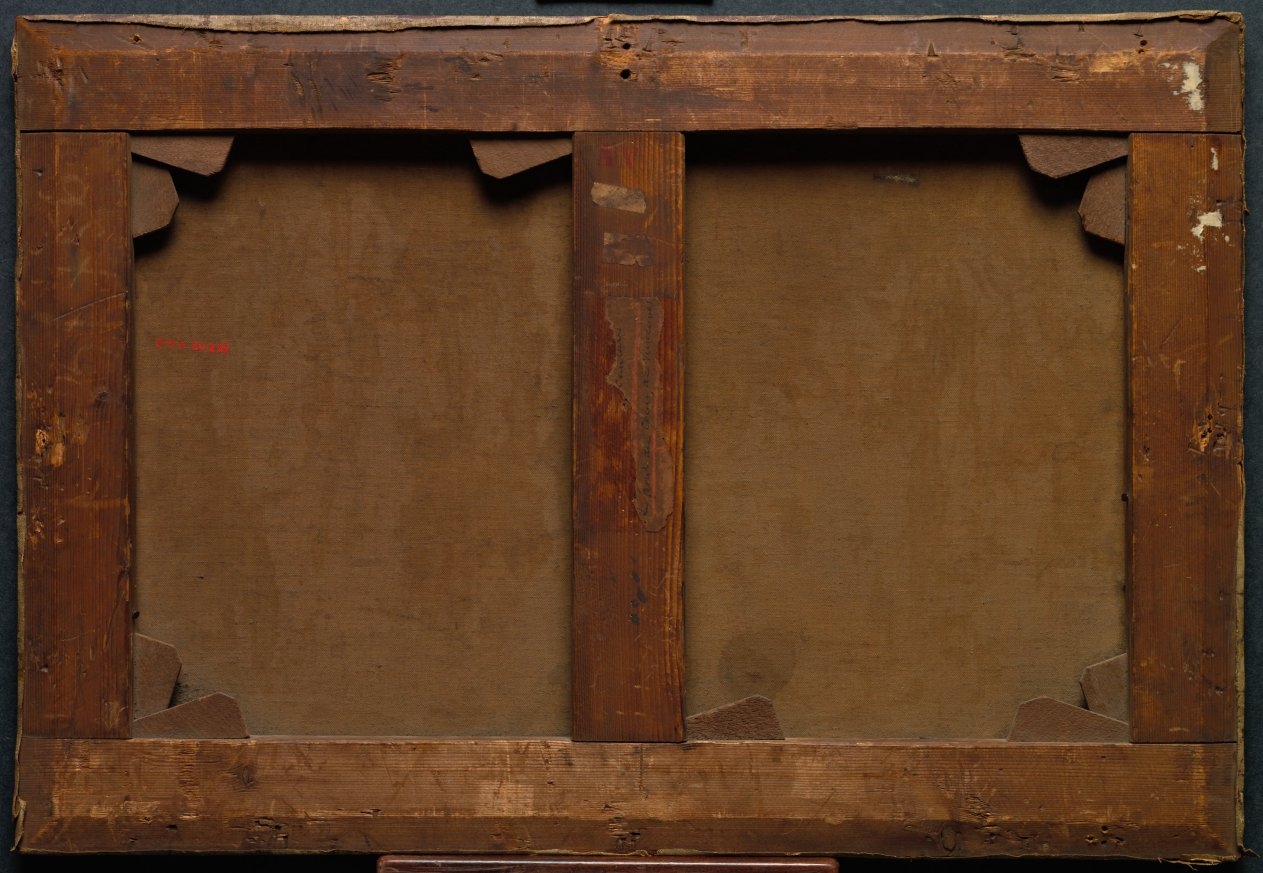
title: Construction of an Elevated Railway: Bridge over the Cours de Vincennes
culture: France, 19th century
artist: Paul Désiré Trouillebert (French, 1829–1900)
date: 1888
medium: oil on fabric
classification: Painting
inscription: Signed lower left: Trouillebert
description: Conceived in 1851, after Napoleon III came to power, the railway encircling Paris was intended to transport merchandise and, eventually, passengers. The railway represented a new convenience, but measures were needed to ensure the safety of other traffic. The numerous railway crossings included in the initial plans turned out to be a source of fatal accidents. To remedy the problem, the platforms and retaining walls were to be raised at the most dangerous spots. The Cours de Vincennes, in the eastern part of Paris, had been one of the deadliest intersections. The work on an elevated railway bridge over this street, which is depicted here, was completed in February 1889. Trouillebert concentrated on portraits until about 1881, when he began to focus on landscapes. He also painted everyday scenes and nudes. He was commissioned by Edme Piot, a public works contractor, to paint this and four related views of the Paris railway construction.